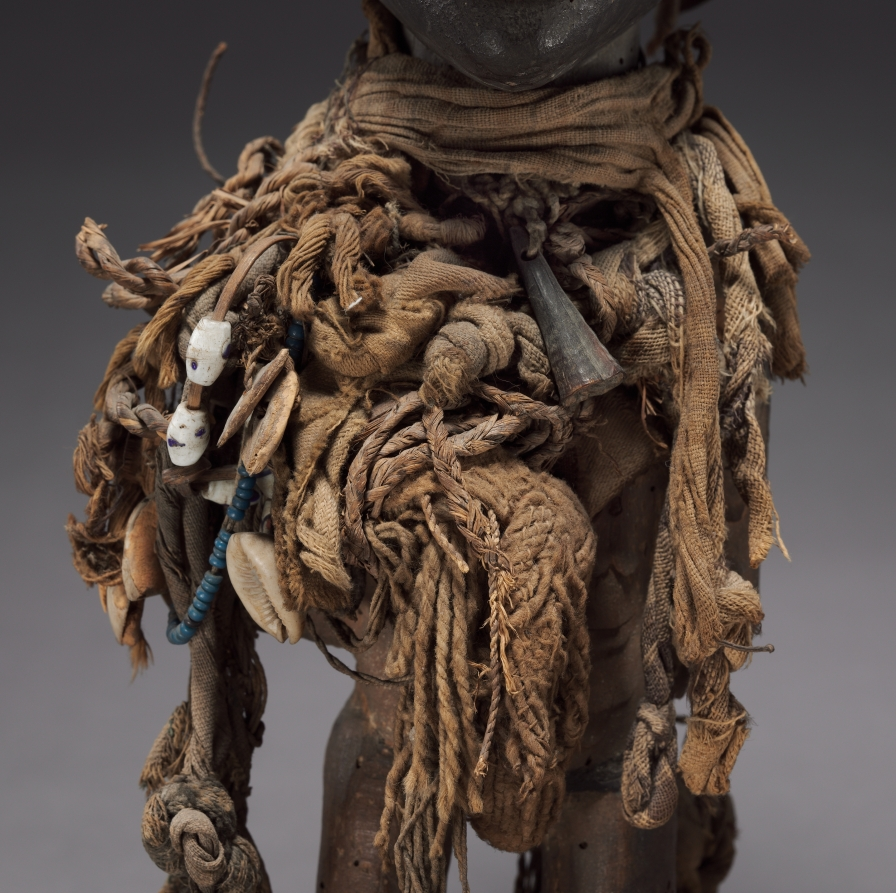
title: Male Figure (Nkisi)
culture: Africa, Central Africa, Democratic Republic of Congo, Cabinda, or Republic of the Congo, probably Vili-style maker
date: late 1800s-early 1900s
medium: Wood, cloth, resin, organic material, feathers, natural fibers, antelope horn, seashells (including cowrie shells), glass beads, metalized glass, and plant fiber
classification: Sculpture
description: Nkisi is an object that is believed to host an ancestral spirit. Unusual among these figures, this nkisi figure is missing its nduda, “night guns.” These guns would be filled with gunpowder functioning as defense against witches or misfortune. Unless its guns were lost during the course of its life history, this nkisi may instead be an example of a more general type called mpanzu, whose functions included protection.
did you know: Different from other figures functioning as defense against witches or misfortune, its “night guns,” or nduda, are missing.